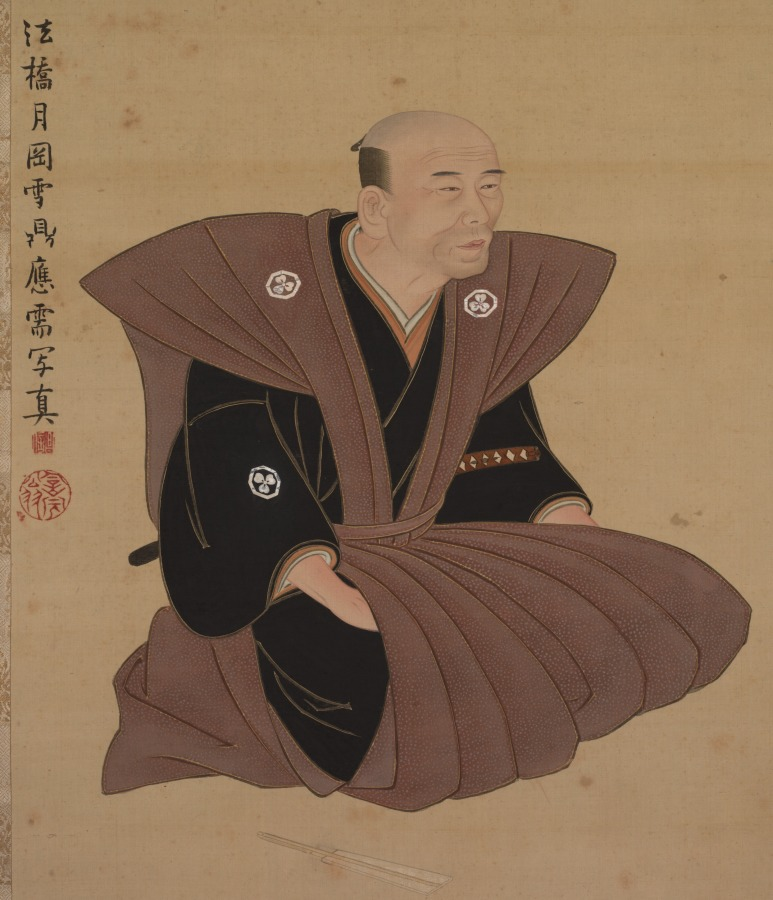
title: Portrait of Samurai-Official: Hirai KyoseiHirai Kyosei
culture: Japan, Edo period (1615–1868)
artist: Tsukioka Settei (Japanese, 1710–1786)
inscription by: Sando Hyosho (Japanese)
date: 1776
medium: hanging scroll; ink and color on silk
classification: Painting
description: In this pair of figure paintings, the artist provided generational portraits of two clan leaders from the Hirai family, accompanied by lengthy inscriptions in a distinctive calligraphic style from separate scholar-officials.